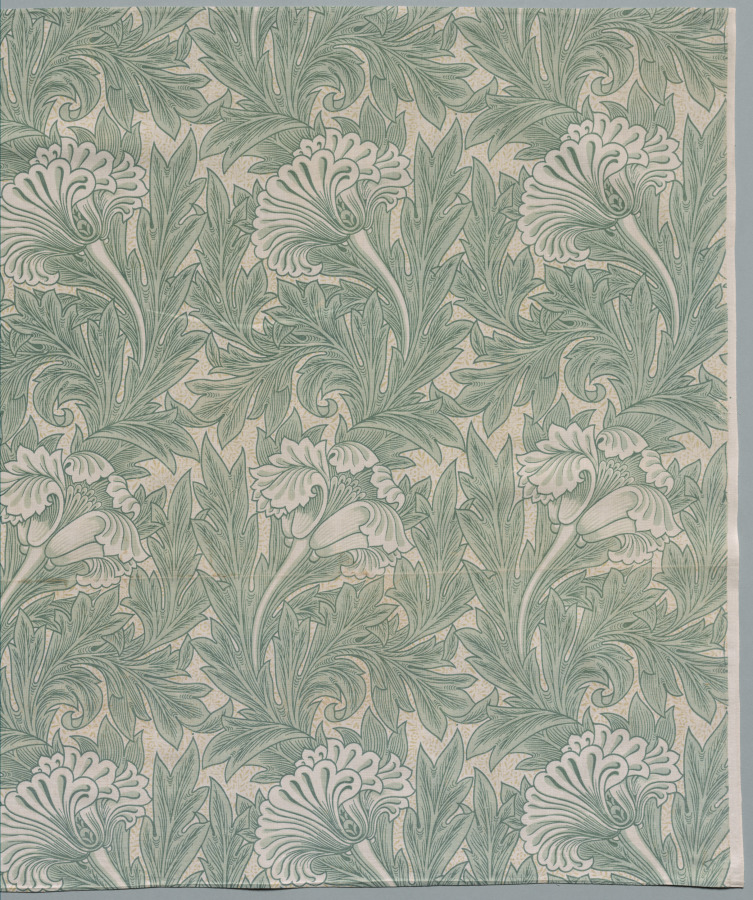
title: Tulip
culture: England, 19th century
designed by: William Morris (British, 1834–1896)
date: 1875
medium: roller printed cotton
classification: Textile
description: William Morris was a designer, craftsman, poet, novelist, businessman, and social activist. A doctor attributed his cause of death at age 62 to “simply being William Morris, and having done more work than most ten men.” His decorative arts firm Morris, Marshall, Faulkner & Co., known simply as Morris & Co. after 1875, designed and sold household furnishings that were sought after for their elegant, colorful patterns and high-quality materials. Morris insisted on producing goods under fair labor conditions, which set him apart from many Victorian manufacturers for whom industrialism meant imposing grueling hours for low wages in dangerous factories. During an age when rooms were stuffed with mass-produced objects and teeming with ornament, Morris challenged consumers to embrace harmony and restraint in decoration: “Have nothing in your houses that you do not know to be useful or believe to be beautiful.” Textiles were among the most profitable of the company’s merchandise and included embroidery, printed cotton, woven fabrics, tapestries, and carpets. Morris’s designs and working philosophy combined a vast knowledge of the past with a vision for the future. His final labor of love, the Kelmscott Press, was founded in 1890 and produced beautiful books with ornaments and typefaces that Morris designed. They were often illustrated by his friend Edward Burne-Jones and other artists. Morris wanted readers to enjoy the tactile experience of holding and reading from these volumes. Printed on high-quality linen paper, many are bound in vellum (animal skin). Their designs have much in common with books printed in the earliest years of the printing press.